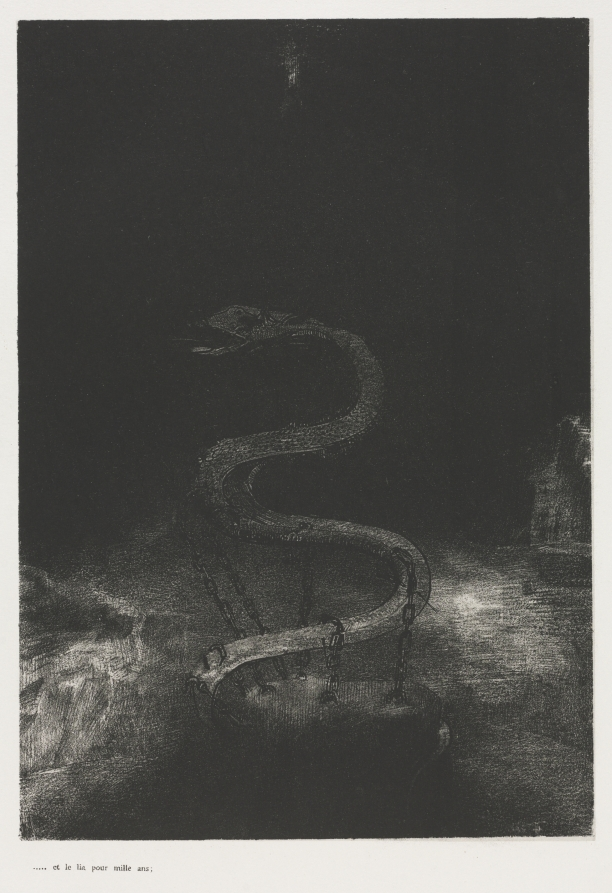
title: And Bound Him a Thousand Years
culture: France, late 19th Century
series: The Apocalypse of Saint John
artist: Odilon Redon (French, 1840–1916)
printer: Blanchard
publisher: Ambroise Vollard (French, 1867–1939)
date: 1899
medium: lithograph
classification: Print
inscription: printed at lower left, below image: .....et le lia pour mille ans;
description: The last of Odilon Redon’s 11 lithographic portfolios, this series relates to the Book of Revelation from the Christian Bible. The subject had been explored throughout art history, allowing the artist to align himself with past masters, such as Albrecht Dürer. Although Redon often vaguely referenced texts, these prints directly illustrate 12 individual passages, including one about a woman clothed with the sun and another focused on a great star falling from heaven. By the time he created this portfolio, Redon’s reputation was well established. The project was published by art dealer Ambroise Vollard, who began to sell and promote Redon’s work about a year earlier, building a market for his prints in Paris and abroad.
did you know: This is one of the last works where Redon experimented with lithograph and all-black medium. In contrast, bright, dazzling colors characterize his late works.